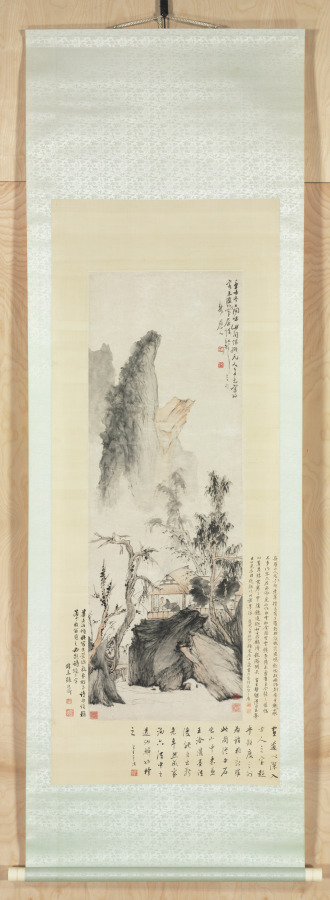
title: Conversation in Autumn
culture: China, Qing dynasty (1644-1911)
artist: Hua Yan (Chinese, 1682–c. 1765)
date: 1732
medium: Hanging scroll; ink and light color on paper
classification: Painting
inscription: Artist's inscription, signature, and 2 seals: On a winter day in the renzi year [1732], while leisurely sitting in my mountain pavilion, I happened to have imitated the brush style of Yuan masters on the two verses: "A guest came from the dusty world for a visit; in the small cottage we talked about the sound of autumn." Xin luo shan ren 新羅山人 [seals] Hua Yan 華喦; Qiuyue 秋岳.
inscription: 1 colophon and 2 seals of Zhang Tingji 張廷濟 (1768–1848): Old Hua [Yan], in this painting, was able to evoke the mood of desolation in nature and match the poetry elegantly. If Fangweng [Lu You 陸游 (1125–1210)] saw this, he would inscribe the painting with two words "idyllic world 詩境."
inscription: 新羅山人為吾鄉老輩，擅長寫生。羅致羽族，翫其飛鳴飲啄。故所作別有生趣。山水不多。作客冬在西泠，見所白雲松舎圖。空靈曠逸，得未曾有，至今憶之。兹幅以蒼秀勝，荒寒之中，復饒逸趣。如坐我鵠灣、龍瀃間矣。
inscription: 1 colophon and 1 seal of Zhu Angzhi 朱昂之 (1764–1841): The highest achievement in the art of painting is to penetrate deeply into the chamber of old masters, but at the same time transcend the bounds of conventional rules. This painting of Xinluo is derived from [the style of] Baishi (Shen Zhou 沈周, 1427–1509) and Baoshan (Lu Zhi 陸治, 1496–1576) with splashed-ink technique of Wang Qia 王洽 (Wang Mo 王默, ?–805), in addition to his own innovative ideas. Hence the distinctive style. Truly, he is one of those who passed through the net of the Six Canons [of Xie He 謝赫, 479–502]; treasure it.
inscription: 2 seals of Ye Tingguan 葉廷琯 (b. 1791); 1 seal unidentified.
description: Two figures sit conversing in a thatched cottage. This painting illustrates two poetic lines: My guest came to sit beyond the dust, In a narrow room, we talked about the autumnal sounds of autumn. Hua Yan presented an intimate world—simple and rustic—amid a landscape. The cool wilderness depicted in this work conveys an aloofness that may reveal the inner world of a scholar-artist who failed the civil service examination but preserved a sense of pride and endurance in his humble surroundings.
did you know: A barren tree on the lower left has a hole in its lower trunk through which is visible a young servant carrying food to the gentlemen in the cottage.